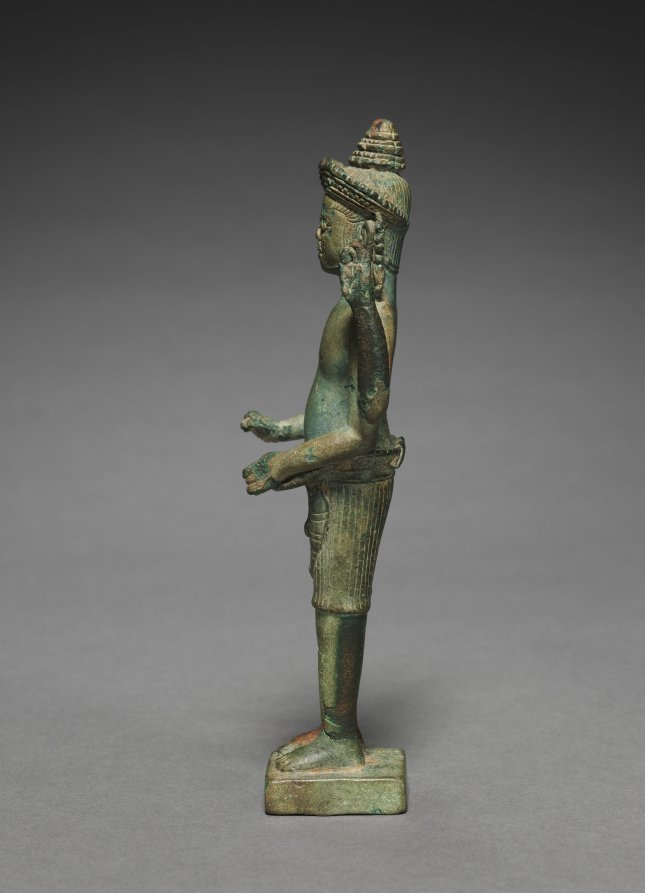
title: Standing Ashura with Four Arms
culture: Cambodia, Koh Ker style, 2nd quarter of 10th Century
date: 925–950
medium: bronze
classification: Sculpture